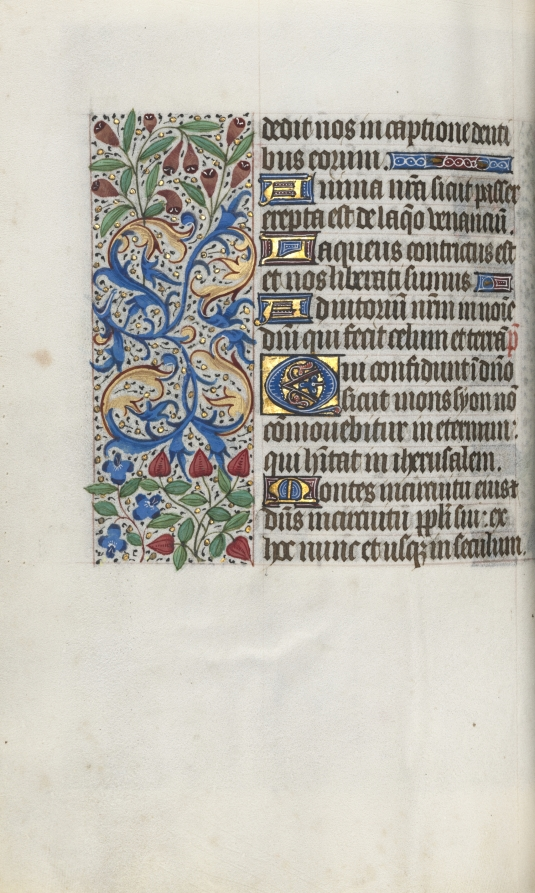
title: Book of Hours (Use of Rouen): fol. 65v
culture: France, Rouen, 15th century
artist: Master of the Geneva Latini (French, active Rouen, 1460–80)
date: c. 1470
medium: ink, tempera, and gold on vellum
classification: Bound Volume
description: In the late 1400s and early 1500s Rouen was an established and important center of book production. The city’s cathedral had a wealthy chapter that spent large sums of money to commission books and to maintain its extensive library. The stationers and booksellers would have likely been concentrated in or near the cathedral precinct. This artist, named after a manuscript now in Geneva, was Rouen’s principal illuminator during the second half of the 1400s.